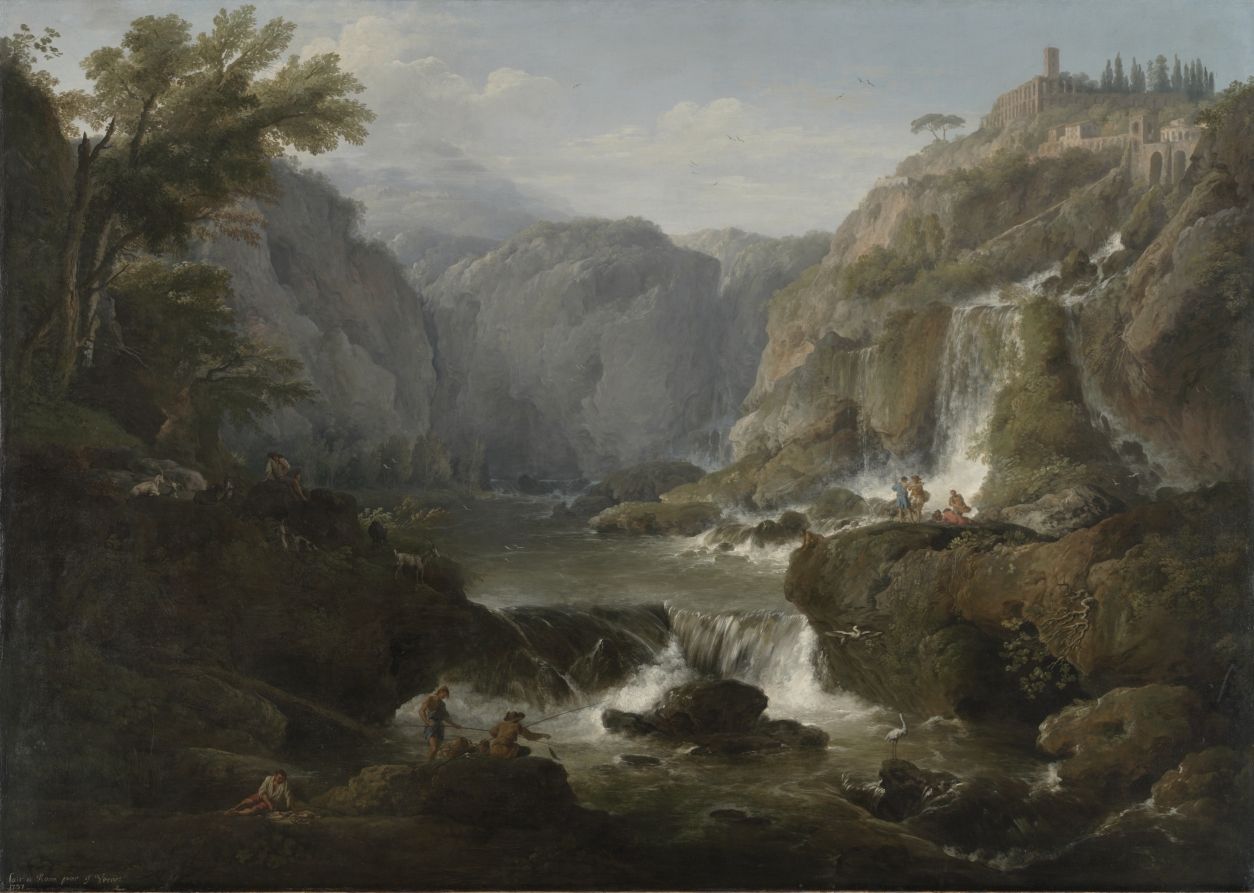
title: The Waterfalls at Tivoli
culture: France, 18th century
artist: Claude-Joseph Vernet (French, 1714–1789)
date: 1737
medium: oil on canvas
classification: Painting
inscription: Signed lower left: "fait a Rome par J. Vernet"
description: Likely Vernet's first major work during his study in Rome, this landscape demonstrates his signature style. Vernet preferred and is remembered for marine subjects and water is also a central theme in this painting. Vernet became the predominant French landscape painter of the 18th century, contributing to a long French tradition. While in Rome, he absorbed the Italian tradition of dramatic, rugged landscape paintings, established by Salvador Rosa in the 1600s. This influence is reflected in Vernet's presentation of the craggy rock formations and cascades that made Tivoli, a small town twenty miles east of Rome, famous. Vernet here synthesizes this style with the calmer pastoral mode, more typical of the French landscape tradition, with its roots in the work of Claude Lorrain. Vernet generally inserted elements of humanity in his work, here evident in the touches of civilization in the background and the fishermen in the foreground. Vernet enjoyed considerable popularity, evidenced by the fact that Napoleon's brother Lucien Bonaparte held this painting as a part of his impressive collection.